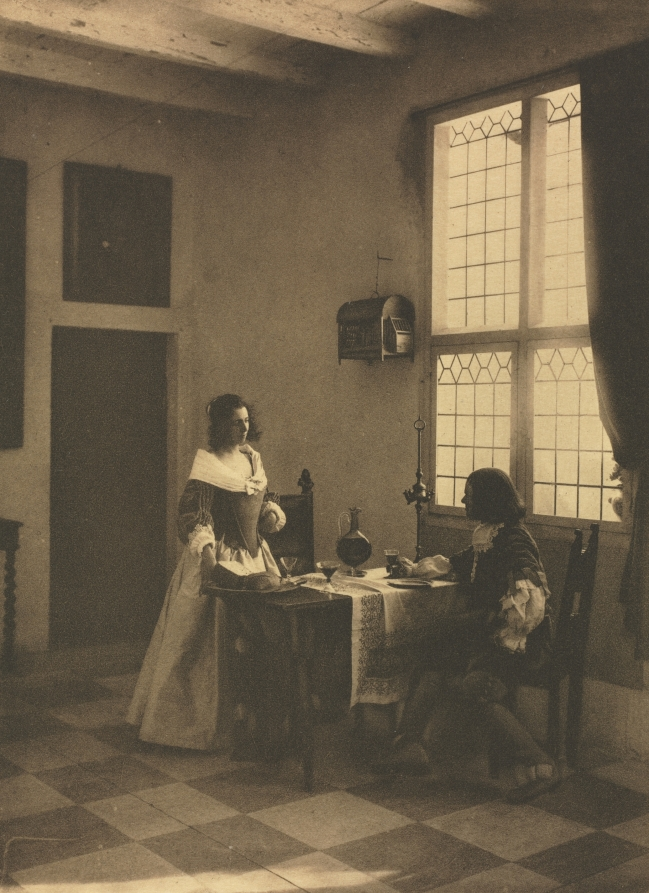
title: Camera Work: A Flemish Interior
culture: Italy, 20th century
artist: Guido Rey (Italian, 1860–1935)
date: 1908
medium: photogravure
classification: Bound Volume